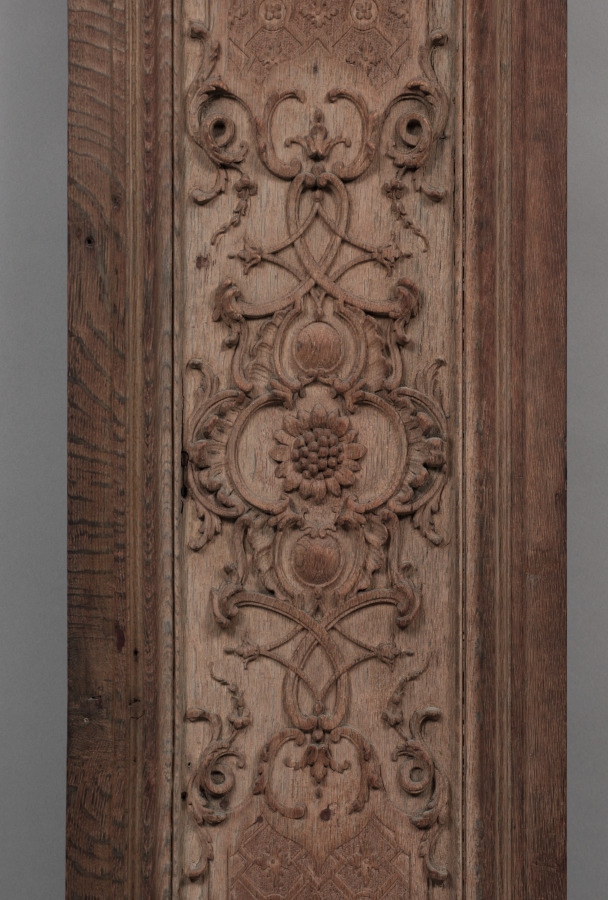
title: Panel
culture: France, Regency Period, 18th Century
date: 1715–1723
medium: wood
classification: Furniture and woodwork